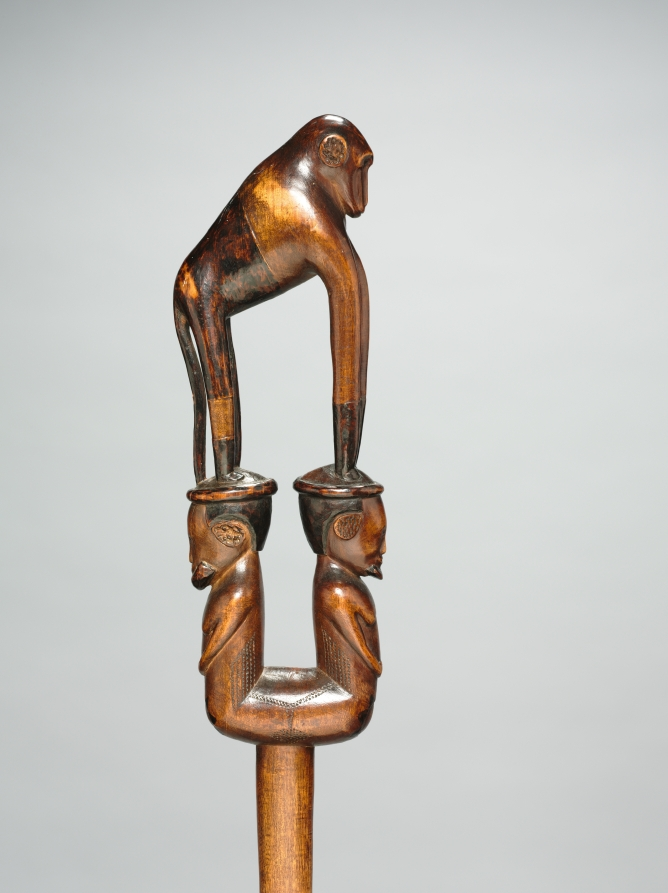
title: Staff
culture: Africa, South Africa, South Africa or Mozambique, probably Tsonga peoples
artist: The Baboon Master (probably Tsonga peoples)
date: 1800s–1900s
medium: Wood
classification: Sculpture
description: Arguably the finest surviving carving of the Baboon Master in a Western collection, this staff features exceptionally sophisticated articulation and detailing. The circular pokerwork motif on one side—which echoes the treatment of the ears on the male heads supporting the baboon—may represent a shield or a leaf. The heads feature the characteristic ornament that signifies maturity and marriage; covered with a mixture of gum, charcoal, and oil, this hairdo, called isicoco, employed a fiber or sinew ring into which the wearer’s hair was woven.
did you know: Artists working on the African continent often moved from place to place; the artist nicknamed The Baboon Master was of the Tsonga culture and worked in the Zulu kingdom.